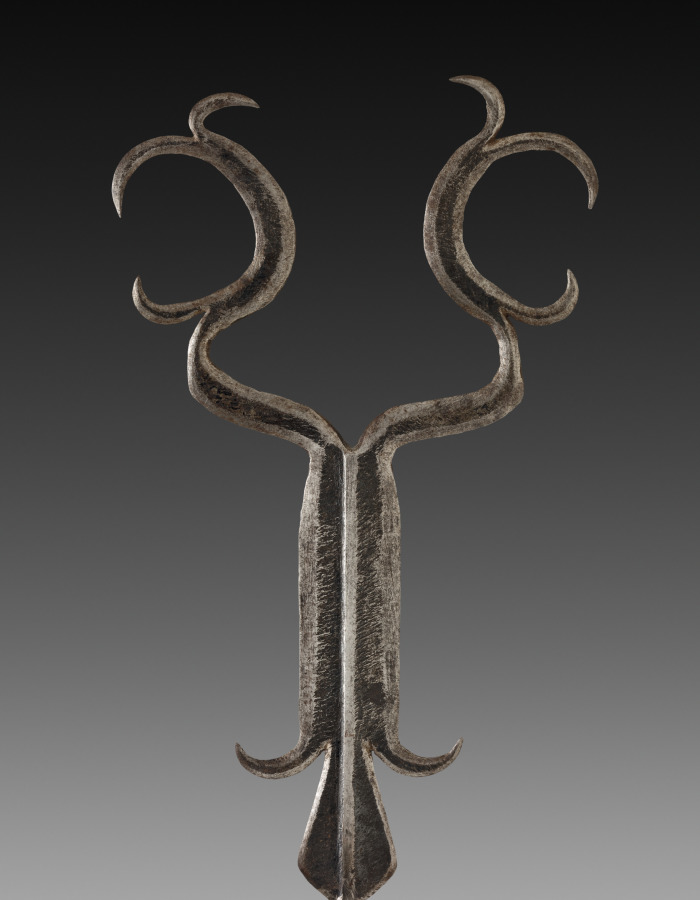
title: Sword (byongi)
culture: Africa, Central Africa, Democratic Republic of Congo, Ekonda-style or Kundu-style maker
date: late 1800s to early 1900s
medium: Iron alloy and wood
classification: Arms and Armor